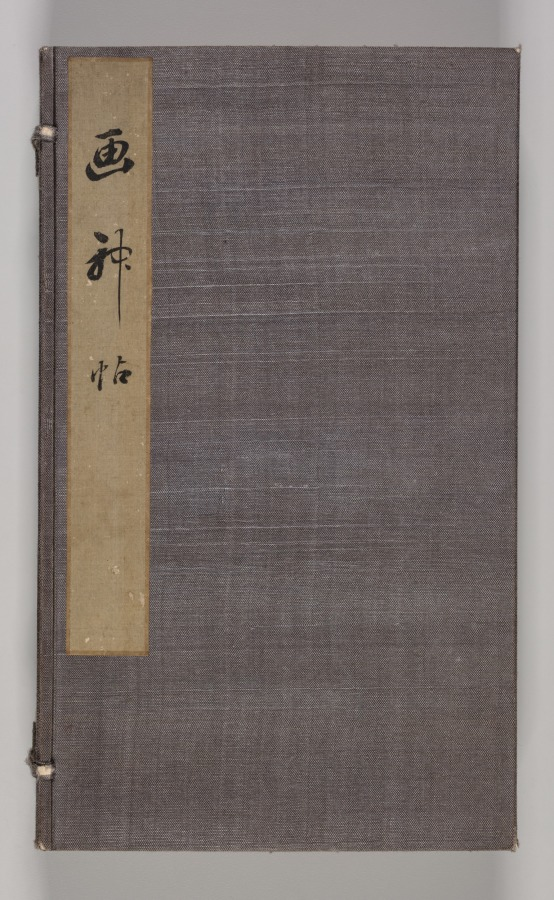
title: Reverberations of Taiga (Volume 2)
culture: Japan, Edo period (1615–1868)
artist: Aoki Shukuya (Japanese, d. 1802)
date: mid- to late 1700s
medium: one of a pair of albums; ink, or ink and light color on paper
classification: Portfolio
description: Traditionally, young painters in Japan began their studies with an established master-painter. The master's compositions invariably became models that the apprentice copied to learn various ink and brush techniques. Shukuya was a pupil of the famous Kyoto artist Ikeno Taiga, whose style is reflected in these sketches of rocks, trees, and mountains.